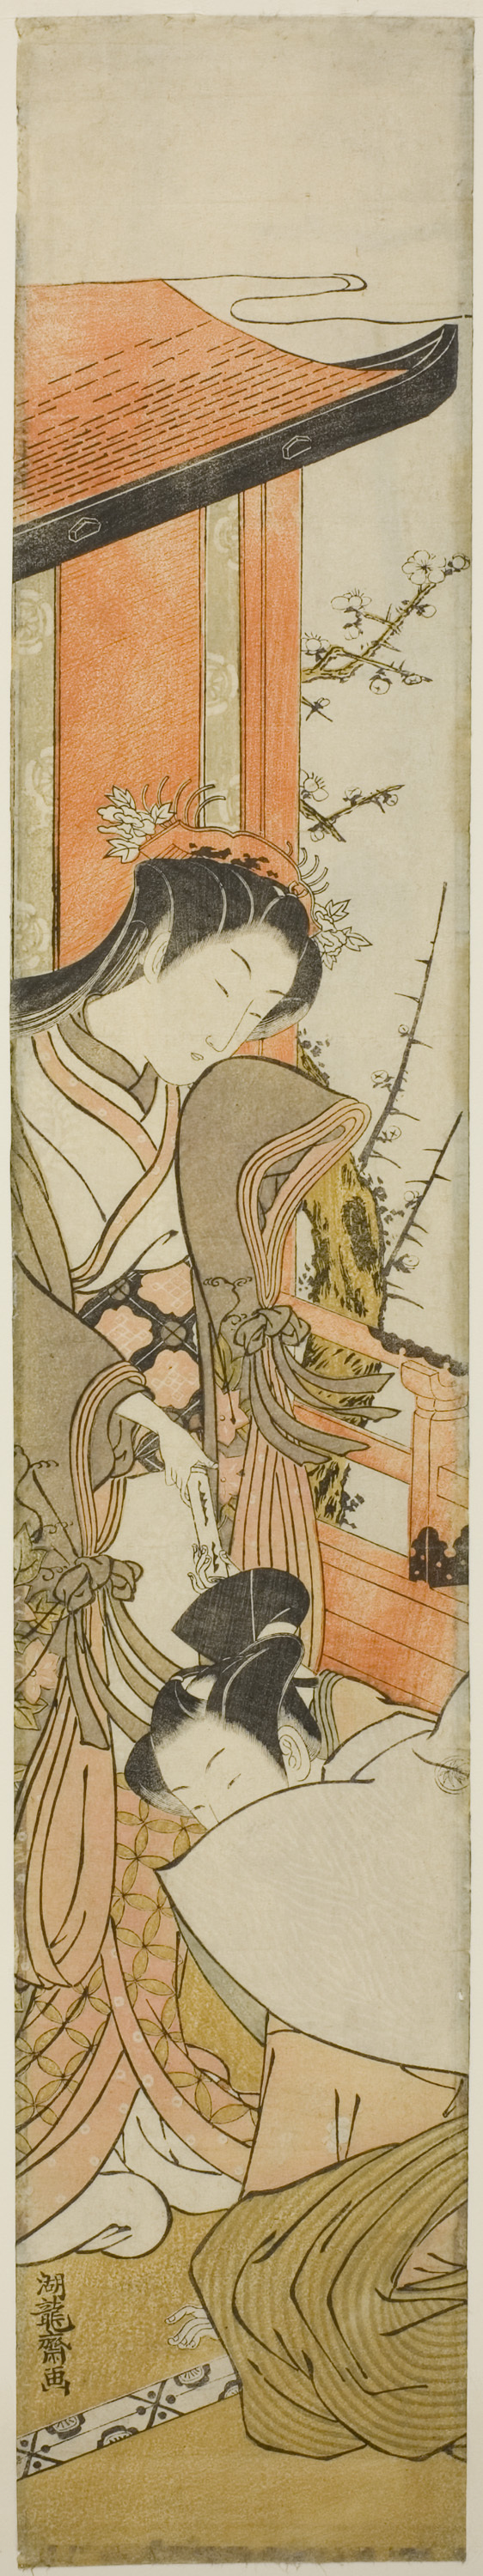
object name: Print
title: Young Woman in Court Attire Receiving Letter from Kneeling Man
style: Japanese (culture or style)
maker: Isoda Koryusai (Japanese, 1735-1790)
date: c. 1772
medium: Color woodblock print; hashira-e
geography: Japan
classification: woodblock print; print; asian art